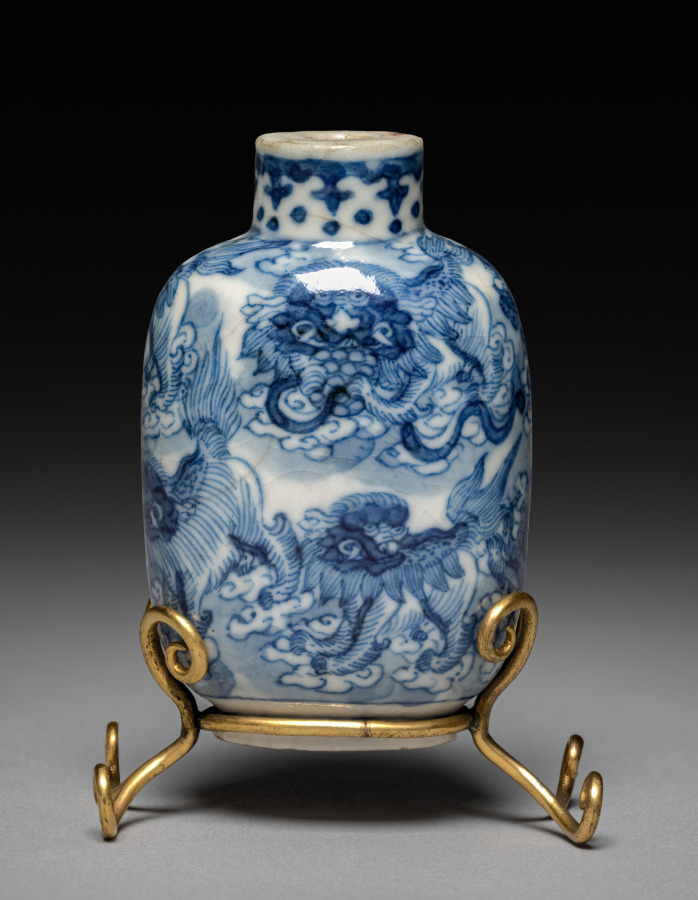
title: Flattened Ovoid Snuff Bottle with Stopper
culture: China, Jiangxi province, Jingdezhen kilns, Ming dynasty (1368-1644), Wanli reign (1572-1620)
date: 1573–1620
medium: porcelain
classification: Ceramic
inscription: 萬曆年製